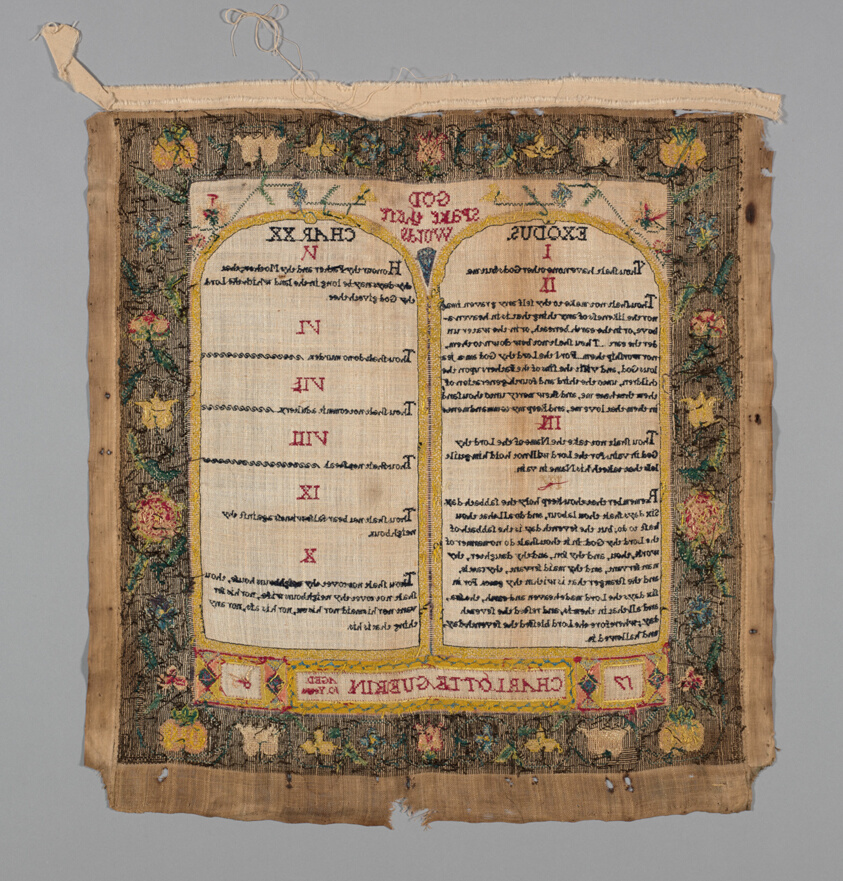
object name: Textile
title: Sampler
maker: Charlotte Guerin (French-Canadian, born 1755/56); Probably Canada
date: 1765/66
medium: Linen, plain weave; embroidered with silk in cross, herringbone, stem, satin, and chain stitches; edged with cotton, plain weave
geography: Canada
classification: textile; needlework (visual works); sampler